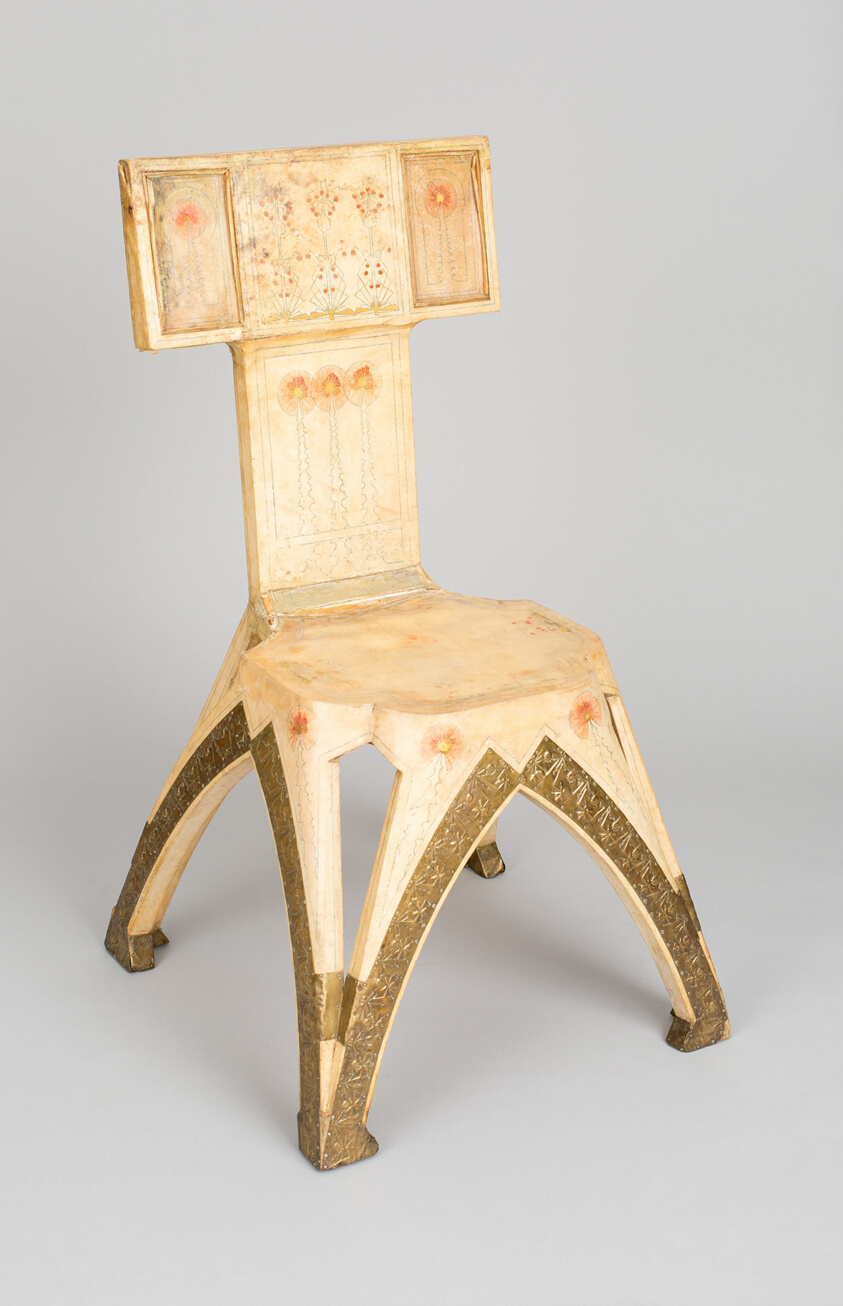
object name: Furniture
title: Eiffel Tower Chair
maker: Carlo Bugatti; Italian, 1856-1940; Italy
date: 1902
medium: Wood frame covered with parchment, painted and gilded, applied brass mounts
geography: France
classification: chair; seating; furniture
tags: furniture